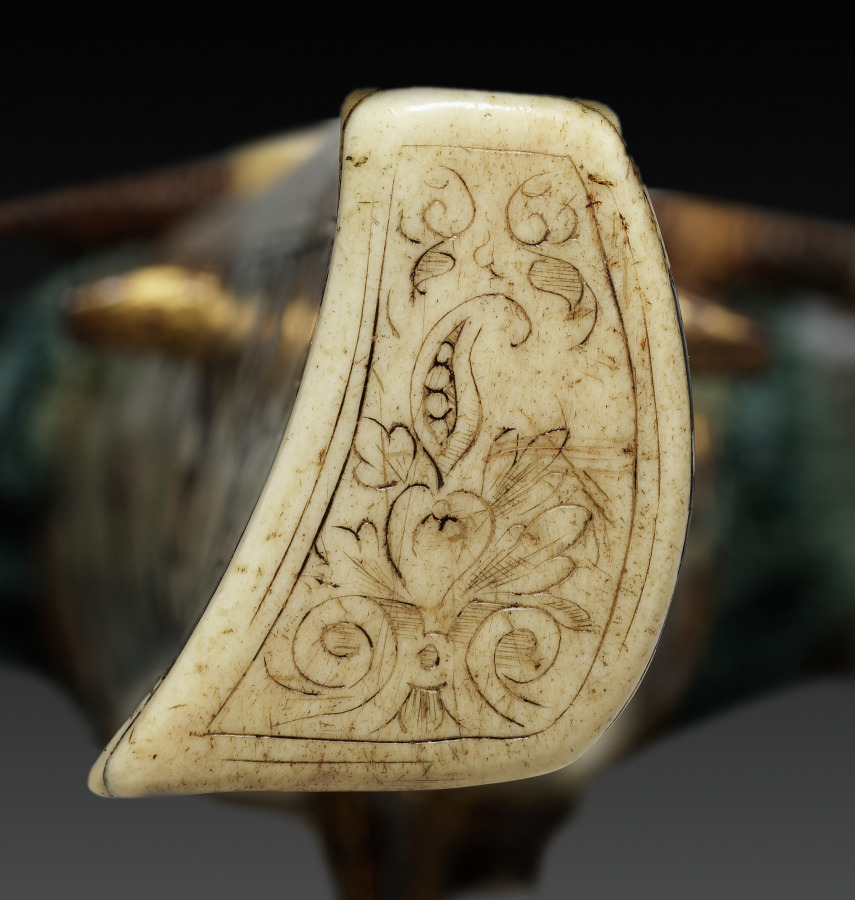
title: Crossbow of Elector Augustus I of Saxony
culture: Germany, Saxony, 16th century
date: c. 1553–73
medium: wood (walnut?), bone veneers, flax cord, steel (etched, traces of gilding). woolen pompoms, stock decorated wih inlaid trophies of arms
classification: Arms and Armor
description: This crossbow was a hunting weapon for Prince Elector Augustus I, a member of the ruling elite in the Holy Roman Empire. Augustus, powerful and wealthy, had even the most practical instruments ornately decorated, including this crossbow and its cranequin, or winding device.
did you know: Augustus was a marksman who took part in crossbow competitions. He had a large collection and often gave them to friends.